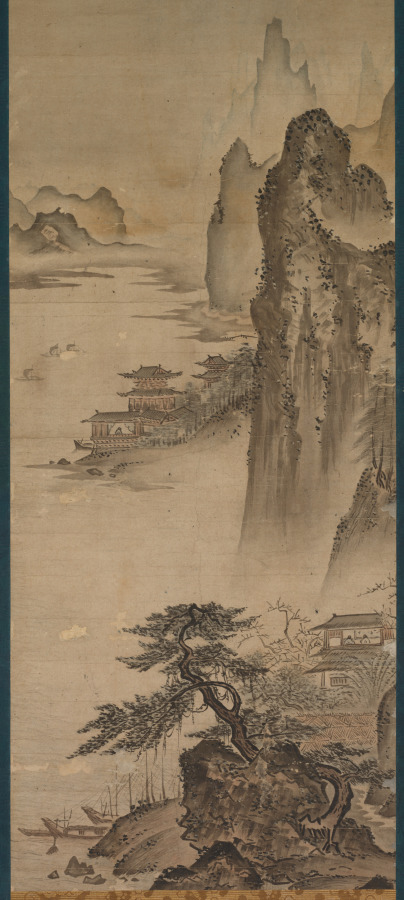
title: Landscape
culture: Japan, Muromachi period (1392–1573)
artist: attributed to Kenkō Shōkei (Japanese, active 1478–1506)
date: late 1400s–early 1500s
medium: hanging scroll, ink and light color on paper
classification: Painting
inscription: inscription above signed Shō'u Kojin; calligraphy by the Shokōji priest Tōgan Zuisen 桃源瑞仙 (1430–89)